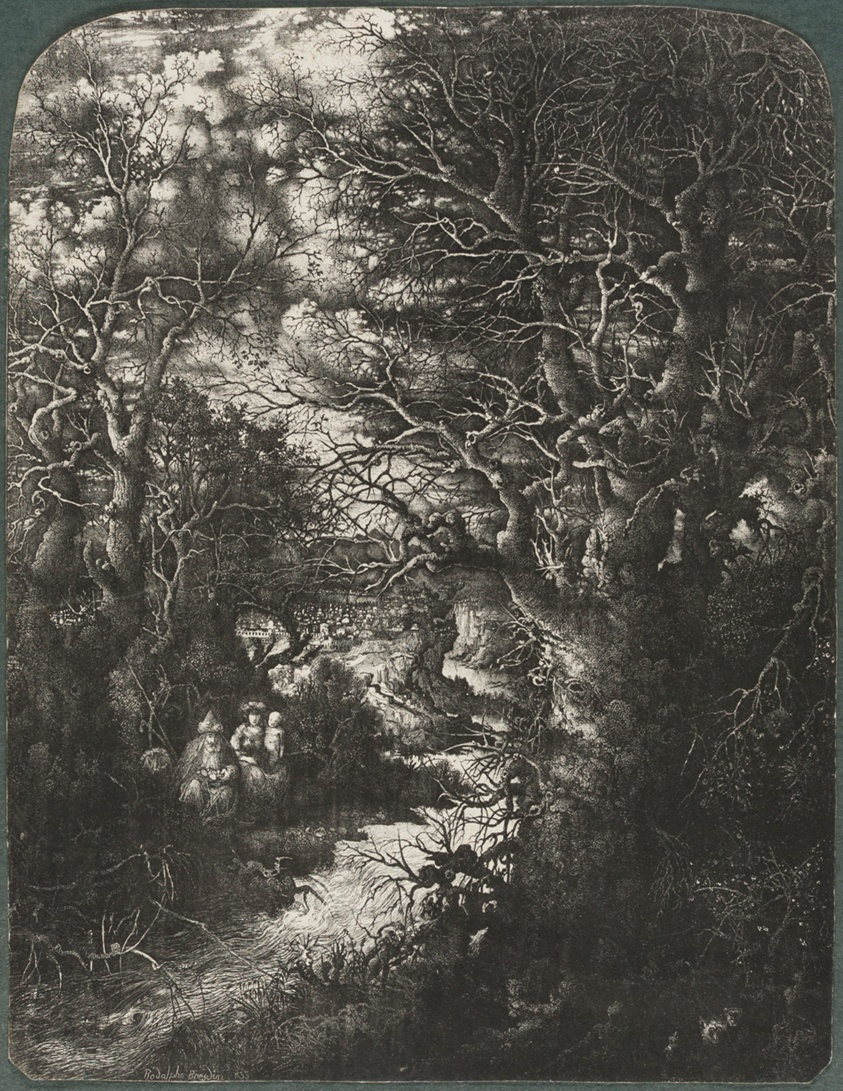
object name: Print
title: The Holy Family at Rest Beside a Stream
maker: Rodolphe Bresdin (French, 1825-1885)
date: 1853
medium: Lithograph on China paper laid down on heavy white wove paper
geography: France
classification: lithograph; print; prints and drawing